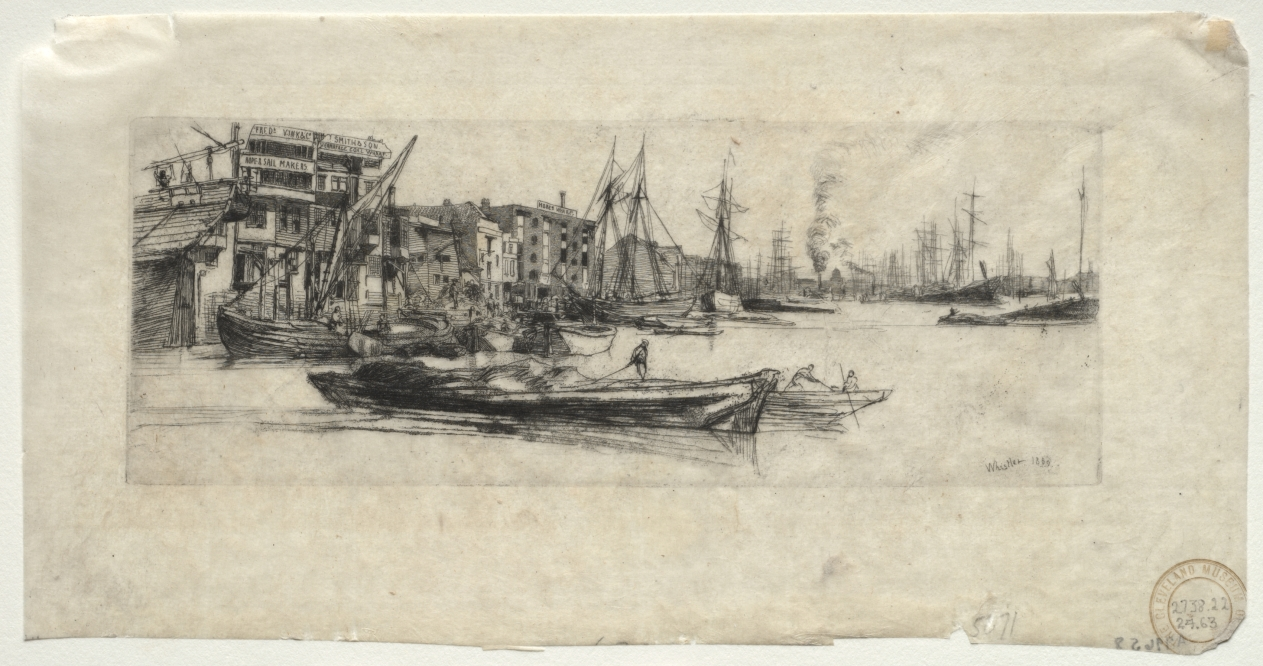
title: Thames Warehouse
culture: America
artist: James McNeill Whistler (American, 1834–1903)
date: 1859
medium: etching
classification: Print